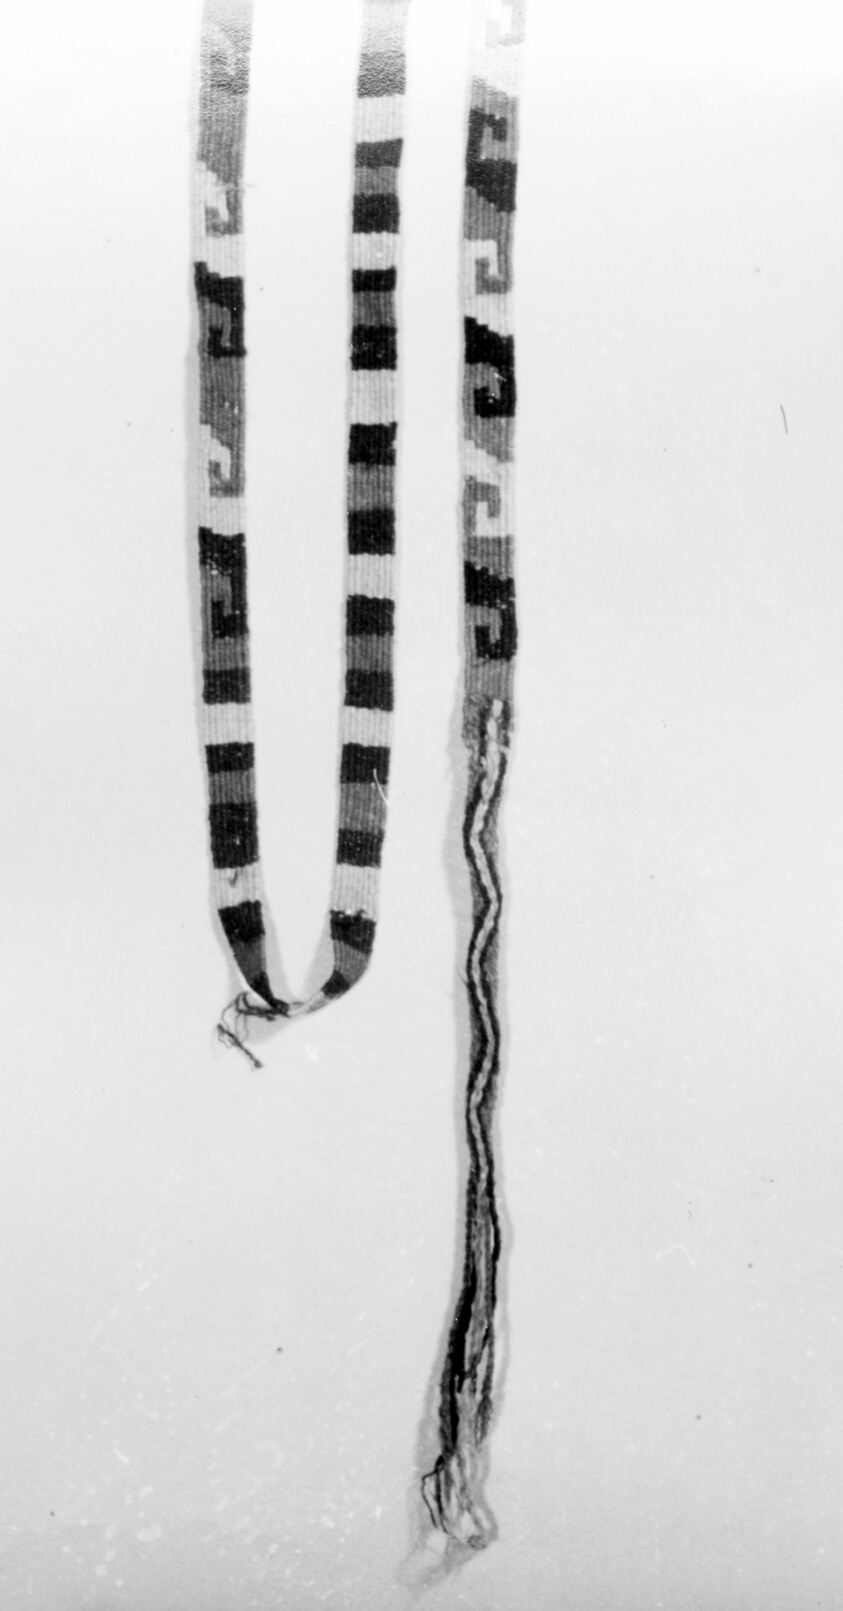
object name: Textile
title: Band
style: nazca, andean, andes, Pre-Columbian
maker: Possibly Nazca-Wari; Probably central or south coast, Peru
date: A.D. 700/900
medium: Slit tapestry, warp fringe.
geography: Peru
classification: textile; weaving